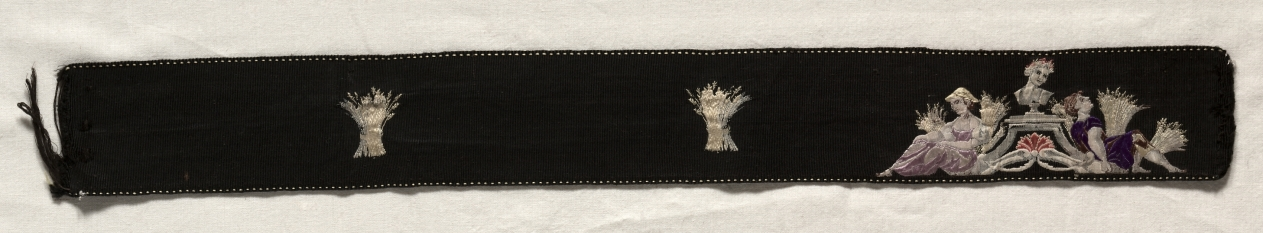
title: Ribbon: "Allegories of Harvest"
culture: England, early-mid-19th century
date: 1800 – 1850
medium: patterned tabby weave; silk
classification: Textile